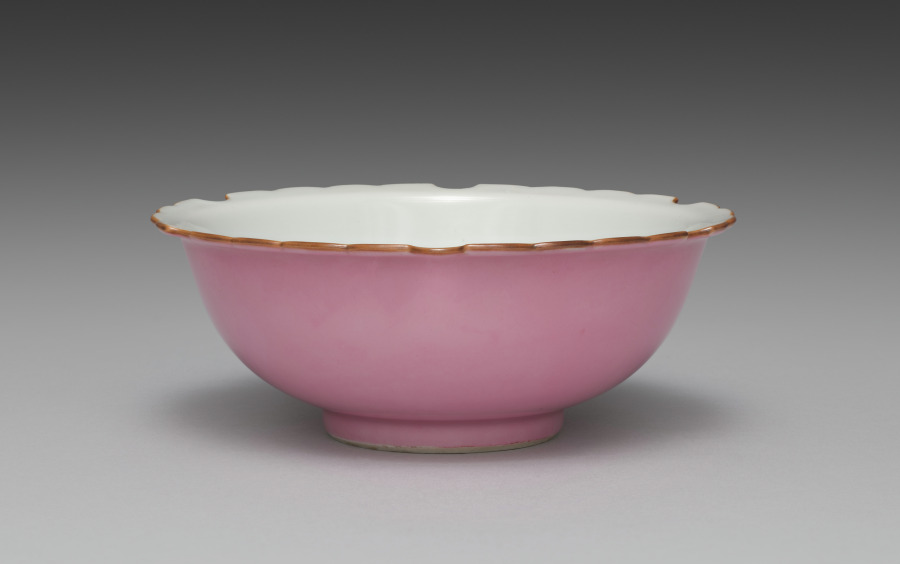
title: Dish from Snow-Flake Side Dishes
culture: Japan, Meiji period (1868–1912)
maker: Seifū Yohei III (Japanese, 1851–1914)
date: 1893–1914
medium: One from a set of six porcelain dishes; porcelain with lobed rims and pink glaze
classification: Ceramic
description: According to the box lid, this set of six side dishes, or mukōzuke, are “snow-flower style” (sekkashiki), having mouths shaped like snowflakes. Their mouths, which have six lobes and scalloped edges, are traced with brown iron oxide at the rim. The outside of each bowl is glazed with a very bright pink over the basin and foot, and the inside is left white. From directly above, one sees a snowflake-like shape, and from the side, they seem to float above a rosy ground.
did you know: The box for this set of dishes has an inscription on the side noting that they were for a person with the family name Nakamoto.